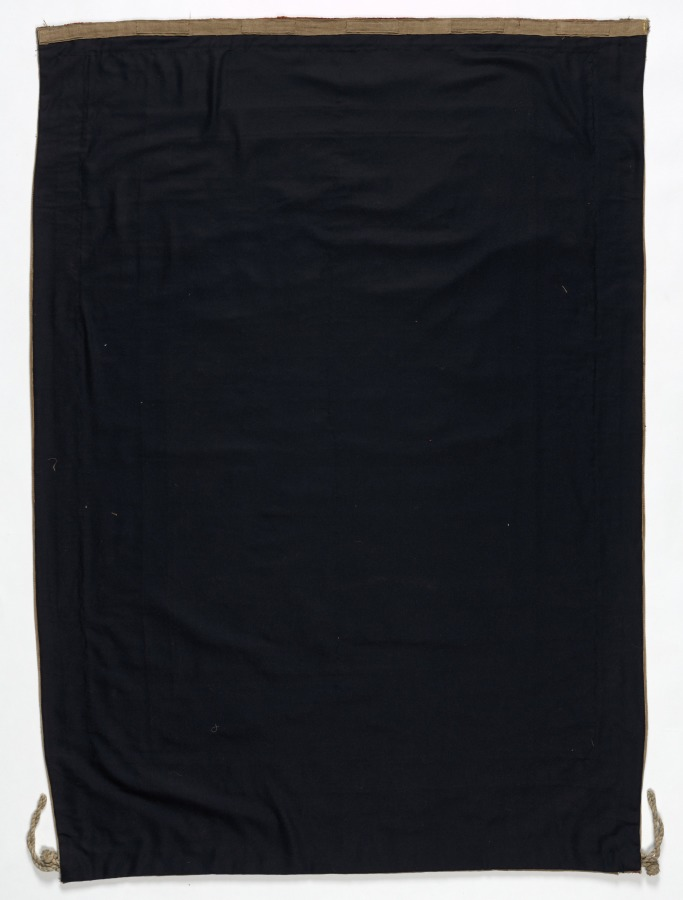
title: Royal Round Tent made for Muhammad Shah (wall panel with one design unit)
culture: Iran, Rasht, Qajar period (1779-1925)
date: 1834–48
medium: Interior: wool: plain weave, inlaid work; silk: embroidery, chain stitch; tape, leather; Exterior: cotton, wool: plain weave; rope, iron ring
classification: Textile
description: Royal tents were potent symbols of authority, wealth, and power throughout the greater Middle East. Rulers owned thousands of tents. They were used for shelter, shade, and innumerable functions in tent compounds that were essential for imperial ceremonies, travel, and military campaigns. Distinguished by size with elaborately decorated interior walls and ceilings, tents could be as large as castles. Opulent tents were also presented as imperial gifts. Tents are only known through documents before 1600. For example, in Baghdad in 809, Caliph Harun al-Rashid owned 4,000 ceremonial tents and 150,000 camping tents that were stored in the imperial Abbasid treasury. An astonishing variety and quantity of tents were housed in the royal Fatimid tent storeroom in Cairo in 1068-69, including "military tents, fortress tents, and castle tents, manufactured of . . . gold-brocaded stuff embroidered with designs of elephants, wild beasts, horses, peacocks, birds." Since 1600, Ottoman Turkish tents with elaborate floral decoration have been preserved in Istanbul in the Topkapi Palace Museum and Military Museum, and in European collections as war booty, primarily from the Ottoman Turks' attempt to conquer Vienna in 1683. These tents are not done in the Rasht technique, but rather are applique. In contrast, royal tents from Iran are extremely rare. This spectacular ceremonial tent is embroidered with the name of its owner, Muhammad Shah, who ruled Iran from 1834 to 1848 during the Qajar dynasty. The radiant jewellike interior features exuberant flora, blossoming vines, and robust birds made with colored wool embellished with silk-thread embroidery.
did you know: Rasht work is named after the city on the Caspian Sea in present-day Iran, which was a major silk trade center with numerous textile workshops.